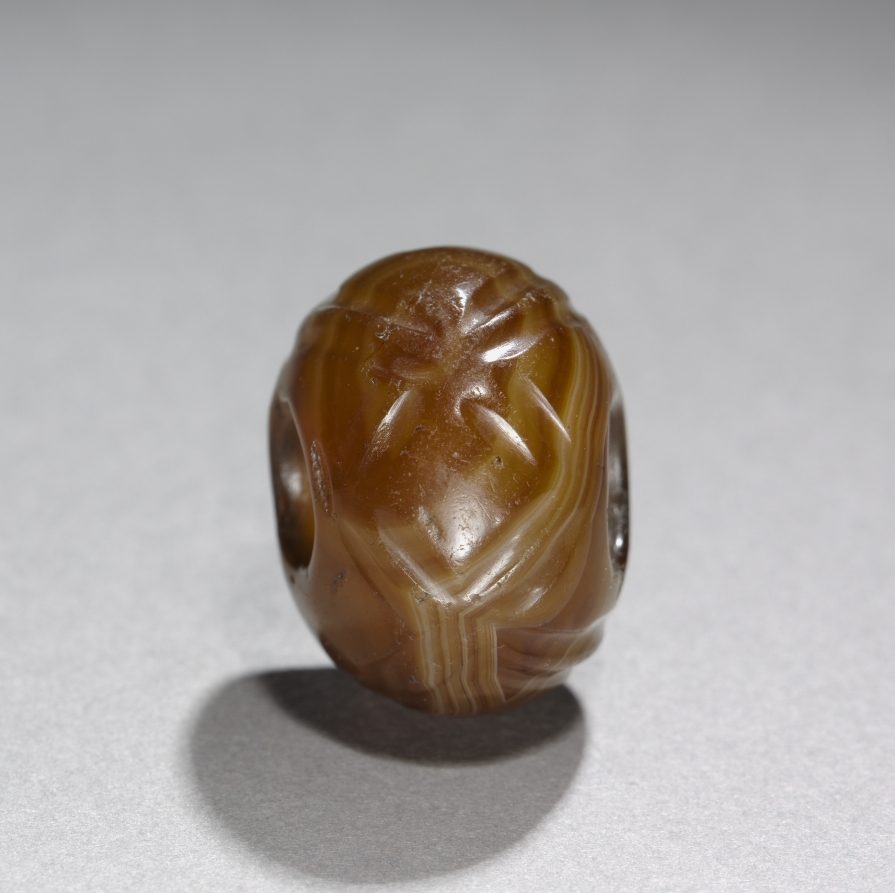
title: Fire Altar Intaglio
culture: Iran, Sasanian Empire (224–651 CE), reign of Hormizd II (303–309)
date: c. 400 CE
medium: chalcedony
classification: Glyptic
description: A Zoroastrian fire altar is carved into this chalcedony intaglio, consisting of a pedestal, pillar, and bowl for an eternal flame. A bird perches above the altar bowl and fish flank the pedestal. A carved star decorates the backside. A pierced hole through the gemstone suggests it once hung on a cord around a neck or wrist. Although the fire altar is a Zoroastrian religious symbol, birds and fish also occur in Christian iconography.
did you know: Seal stones served as signatures and seals for documents.